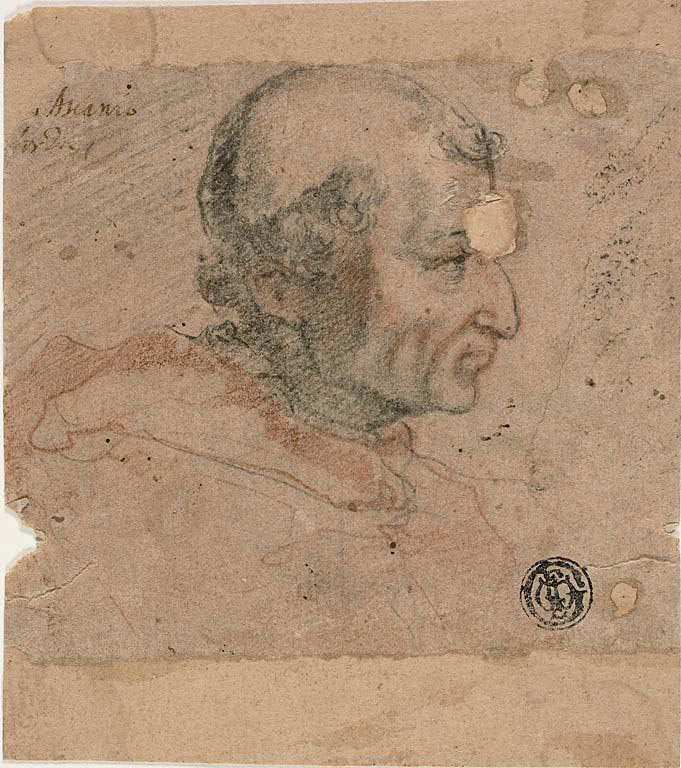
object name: Drawing and Watercolor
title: Ascanio Sforza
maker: Circle of Federico Zuccaro (Italian, c. 1542-1609)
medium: Red and black chalk on tan laid paper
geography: Italy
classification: chalk; drawings (visual works); prints and drawing